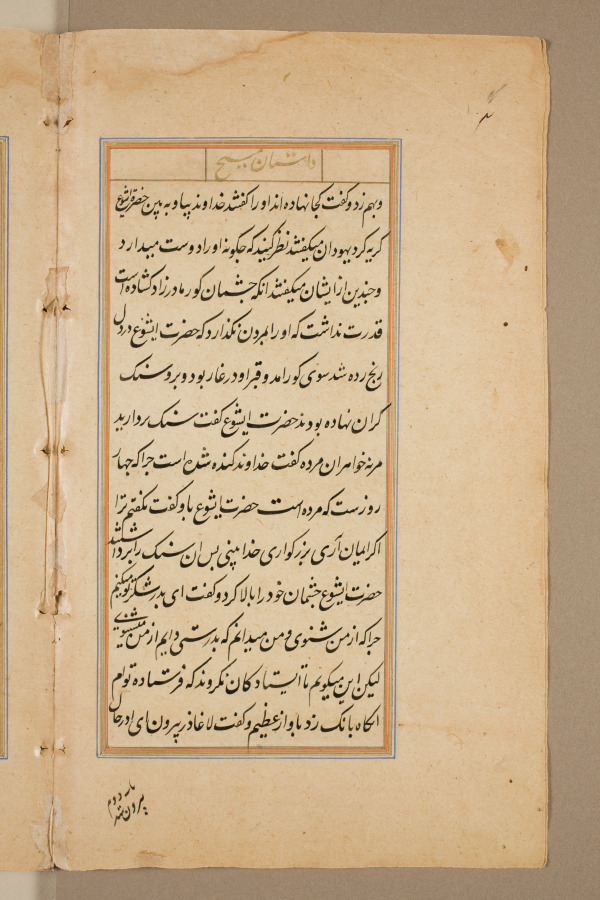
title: Text page from a Mirror of Holiness (Mir’at al-quds) of Father Jerome Xavier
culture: Mughal India, Allahabad, made for Prince Salim (1569–1627)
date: 1602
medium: Ink and gold on paper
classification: Manuscript